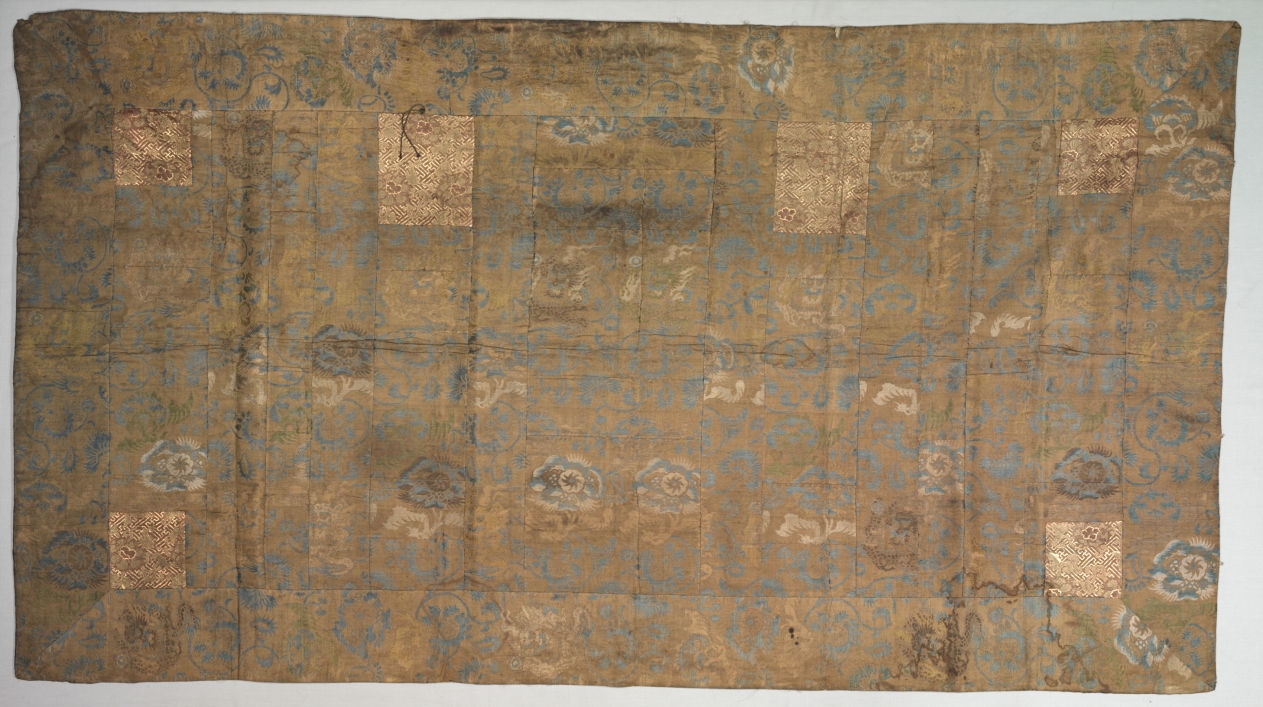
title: Buddhist Vestment (Kesa)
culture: Japan, Edo period (1615–1868)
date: early 1800s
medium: silk; metal thread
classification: Garment